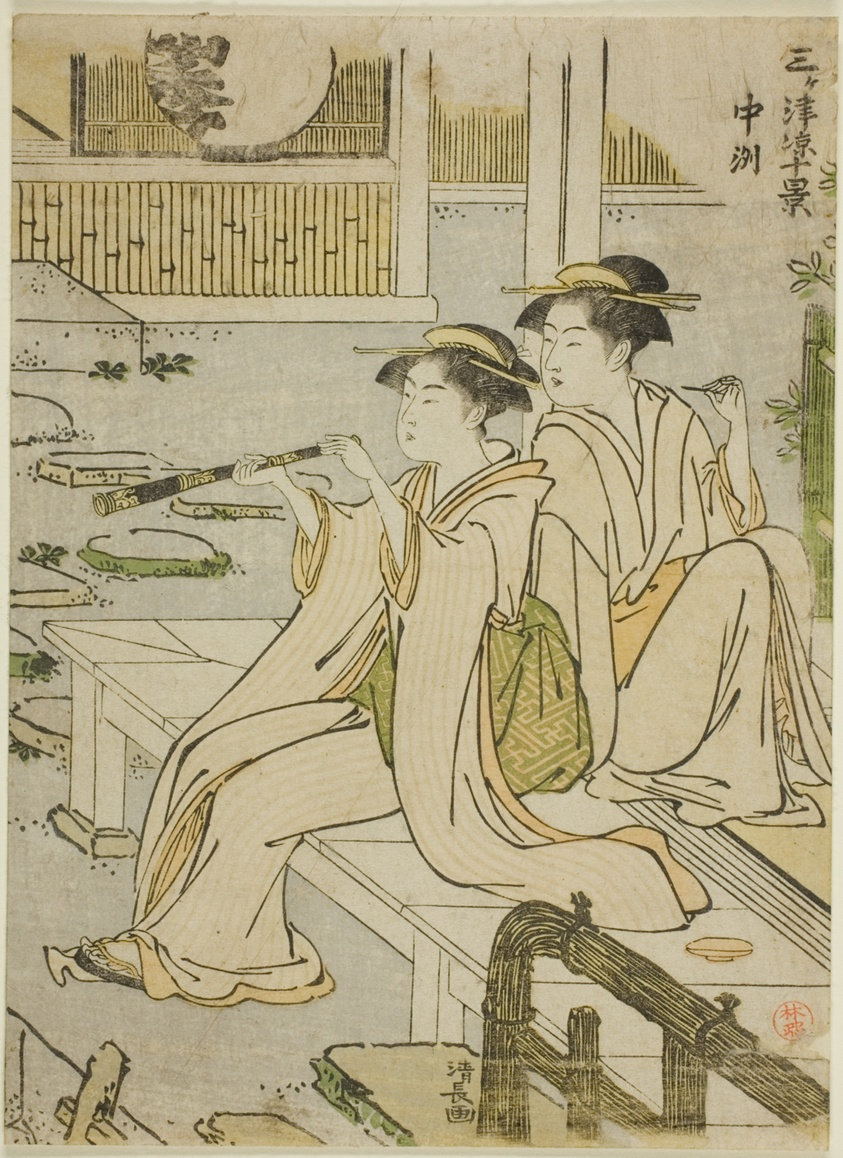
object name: Print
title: Nakasu, from the series "Ten Scenes of Enjoying the Cool in the Three Cities (Sangatsu ryo jikkei)"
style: Japanese (culture or style)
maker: Torii Kiyonaga (Japanese, 1752-1815)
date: c. 1785/86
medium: Color woodblock print; koban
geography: Japan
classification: woodblock print; print; asian art